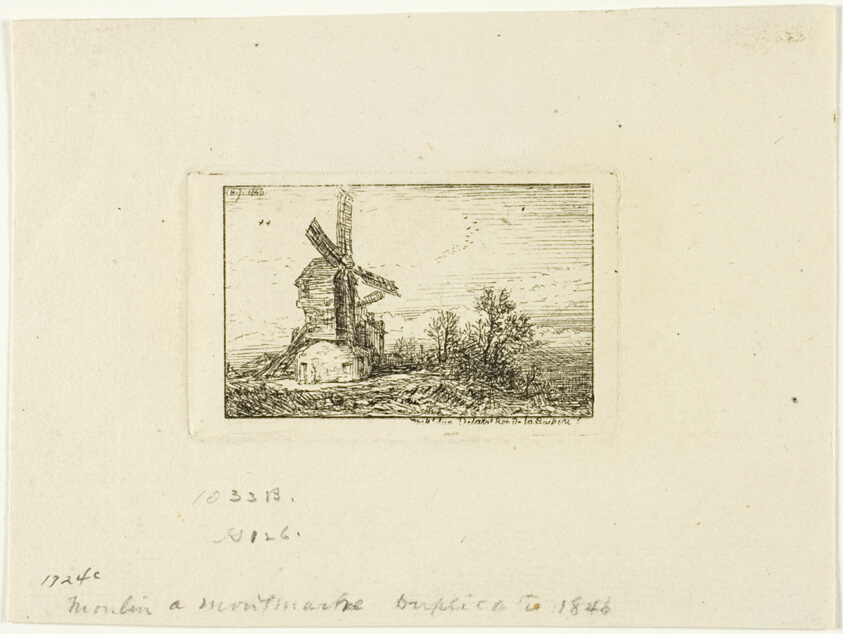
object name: Print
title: Windmill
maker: Charles Émile Jacque (French, 1813-1894)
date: 1846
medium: Etching on ivory laid paper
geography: France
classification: etching; print; prints and drawing